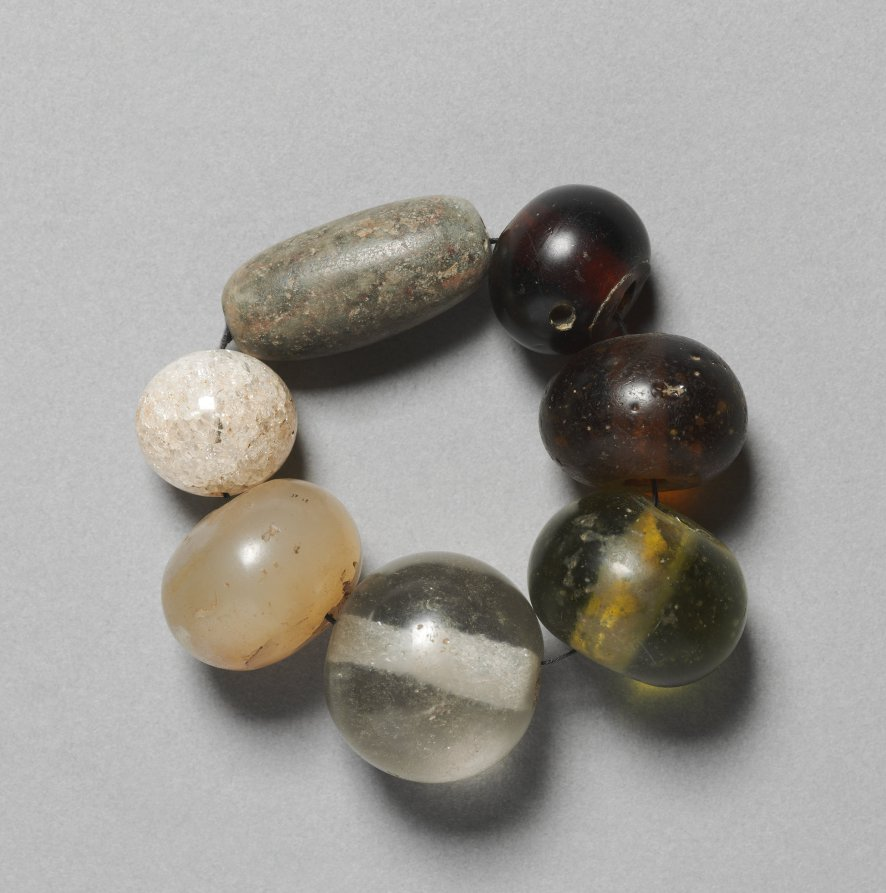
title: String of Glass Beads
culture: Korea, Joseon dynasty (1392–1910)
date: 1392–1910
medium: glass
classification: Jewelry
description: Over the course of the Joseon period (1392–1910), burials became simpler in comparison to earlier periods due to the increasing reverence for Neo-Confucian teachings focusing on everyday ethics rather than salvation after death. However, this type of small object, which might have been cherished by the dead, were still buried as the token of memory.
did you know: Accessories such as a string of glass beads were among various burial items in the Joseon period (1392–1910).